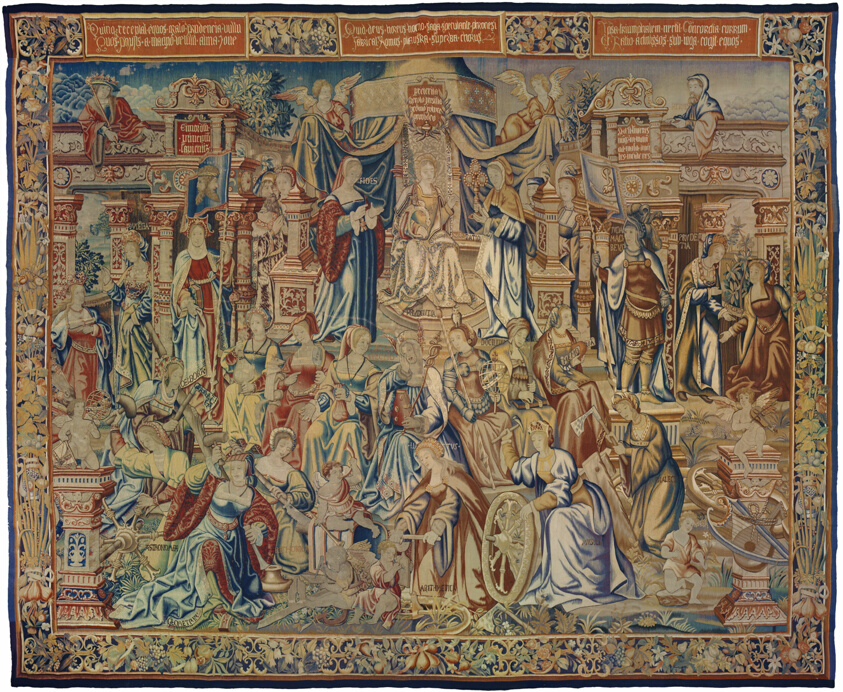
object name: Textile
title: Prudentia (Prudence), from Los Honores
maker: Presumably after a design by Bernard van Orley (Netherlandish, c. 1492-1542) and unidentified artists; Possibly woven at the workshop of Pieter van Aelst (Flemish, c. 1450-1533; left side); Brussels, 1525/32 (left side); Belgium or France, 1905/08 (right side)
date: 1525/32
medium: Wool and silk; slit, dovetailed, and double interlocking tapestry weave. Warp: Count: 7–8 warps per cm; wool: S-ply of three Z-spun elements; diameters: 0.5–1.0 mm Weft: Count: varies from 16 to 32 wefts per cm; wool: S-ply of two Z-spun elements; diameters: 0.4–1.0 mm; silk: S-ply of two Z-twisted elements (maybe replacement wefts); diameters: 0.4–0.9 mm. Right half of piece was rewoven.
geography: Flanders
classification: weaving - tapestry; textile